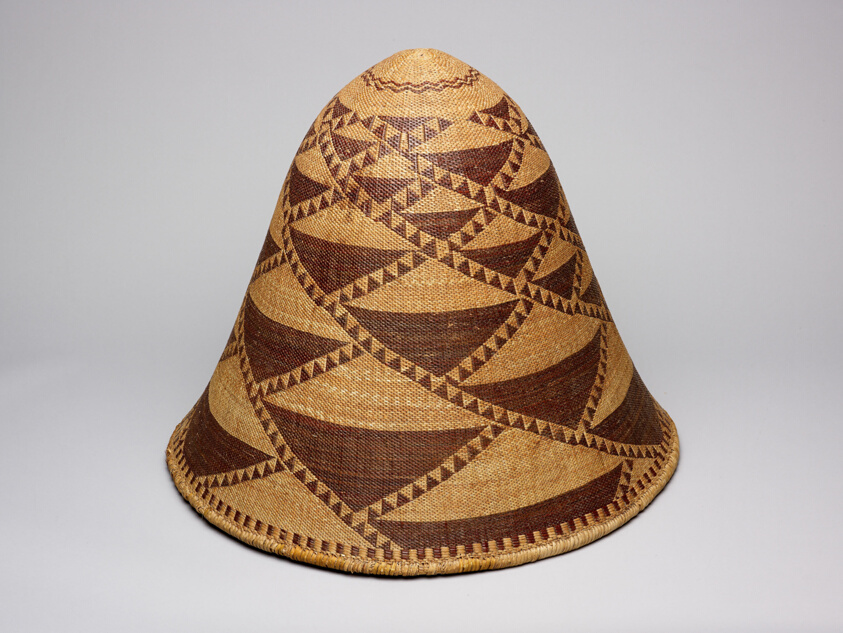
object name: Basketry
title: Burden Basket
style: pomo, native american, northern california, americas, Arts of the Americas, native north american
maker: Pomo (Northern California, United States)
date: 1870–80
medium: Plant fibers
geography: California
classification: basketry; vessel; fiber; wood; art of the americas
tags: basketry, baskets, diagonals, geometric